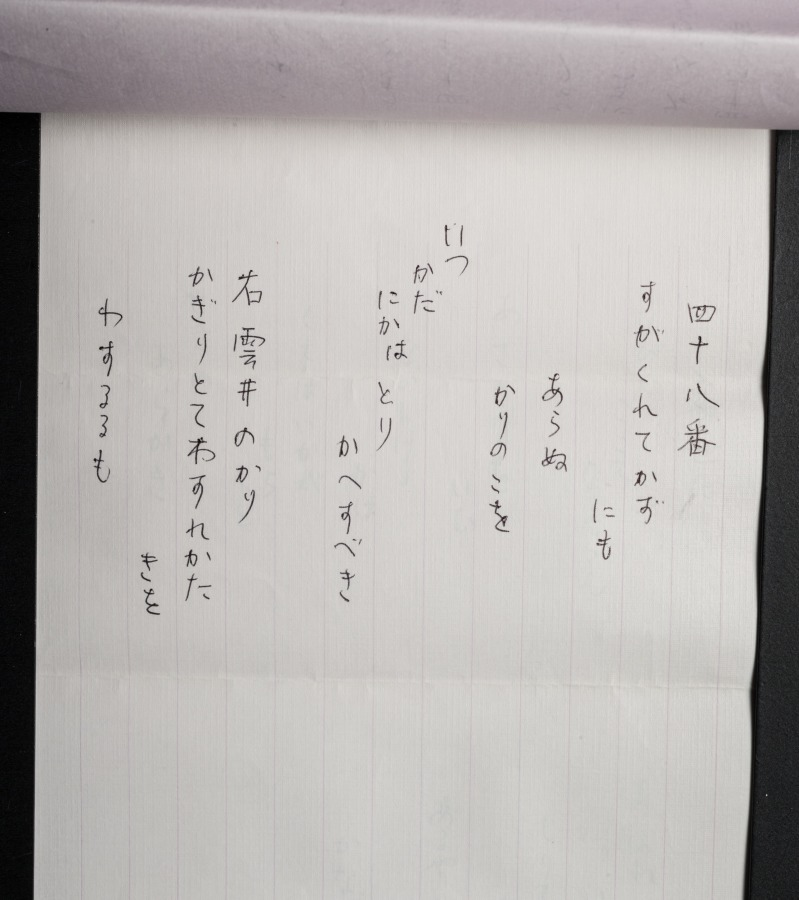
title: Section of an Illustrated Tale of Genji Poetry Contest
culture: Japan, Muromachi period (1392–1573)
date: 1400s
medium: section of a handscroll mounted as a hanging scroll; ink on paper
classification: Painting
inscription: 四十六番 左 ひげくろの大将 心さえ空にみだれし雪の［も」夜に ひとりさえつるかたしきの袖／ 四十七番 うきことを思ひさわ げばさまざまに くゆるけむりぞ いとど たち そふ／ 四十八番 すがくれてかず にも あらぬ かりのこを いづかたにかはとりかくすべき／ 右 雲井のかり かぎりとてわすれがたきを わするるも こや世に なびくこころな るらむ／ あさきなを いひ ながしける かわ ぐちは いかが もらしし せきのあらがき／ あわれをもいかに しりてか なぐさ めむ あるや 恋しき なきや かなしきに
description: This hanging scroll was once part of a handscroll depicting a waka (thirty-one syllable verse) poetry contest between characters from the 11th-century literary classic Tale of Genji. In this section, a woman known informally as Kumoi no kari, or “Goose in Fog,” after a lovelorn line she hums in the novel, is pitted against Higekuro no taishō, or “General Blackbeard.” Three of his poems, numbered 46 to 48, from “The Handsome Pillar” chapter appear over his image. The subsequent three poems inscribed above Kumoi no kari are presented as her “responses,” and come from "The Plum Tree Branch", “New Wisteria Leaves”, and "Evening Mist" chapters.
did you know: General Blackbeard laments having smelly ash poured upon him by his angry wife in one of the poems.